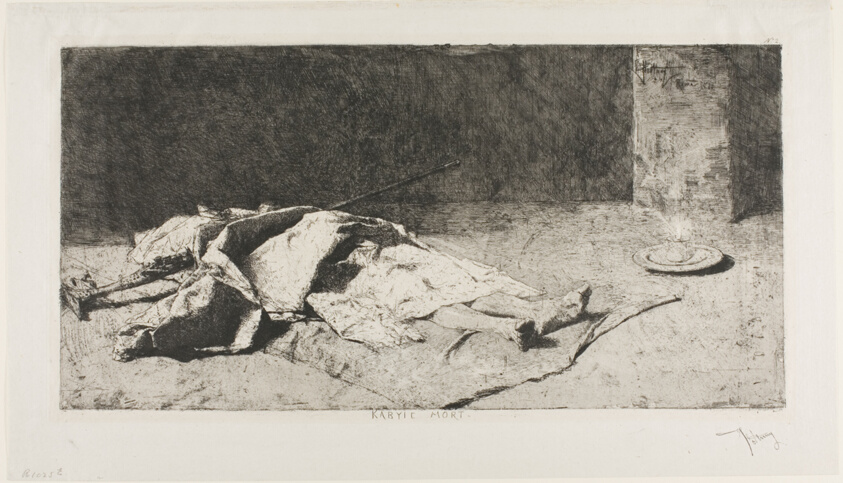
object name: Print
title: Dead Kabyle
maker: Mariano José María Bernardo Fortuny y Carbó; Spanish, 1838-1874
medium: Etching on paper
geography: Spain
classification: etching; print; prints and drawing